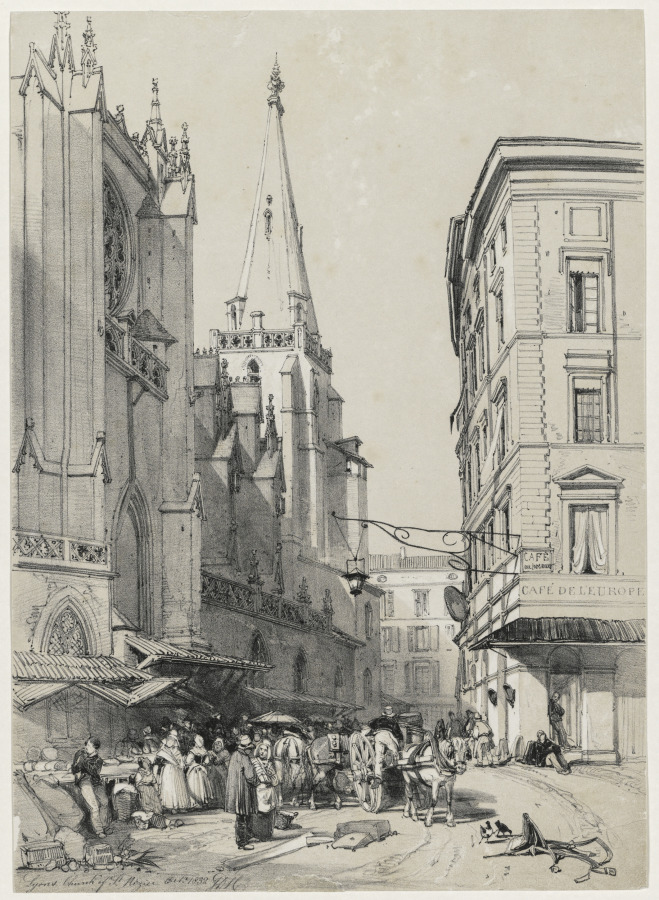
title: Sketches at Home and Abroad: Lyons Church of St. Hezier, October 1832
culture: England, 19th century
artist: James Duffield Harding (British, 1798–1863)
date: 1832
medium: lithograph with tint stone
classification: Print